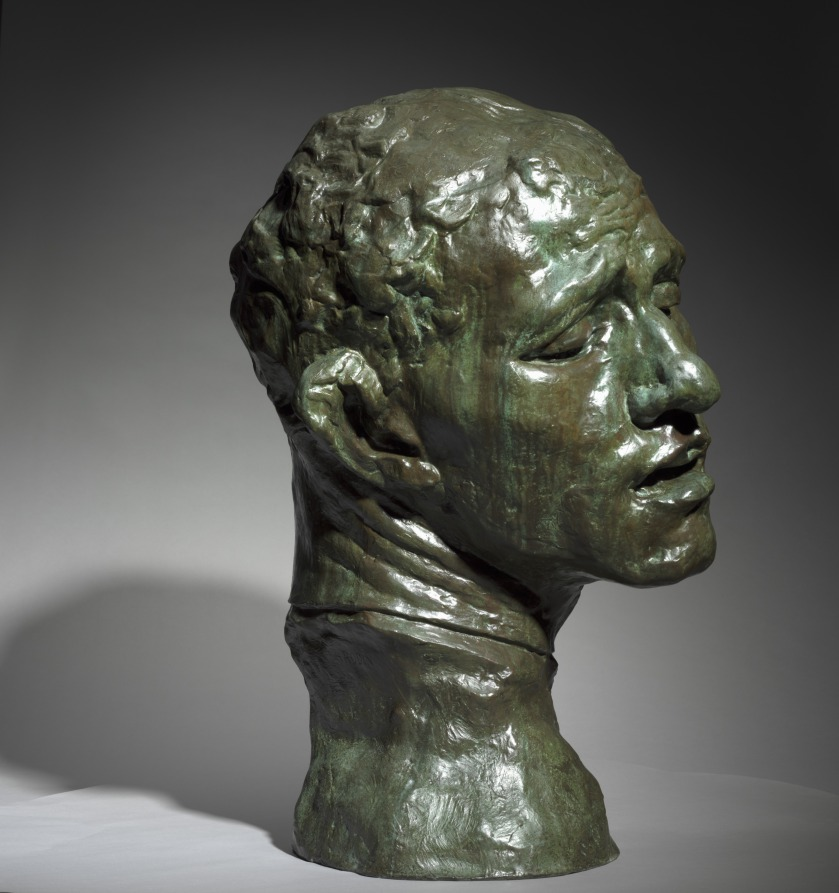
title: Heroic Head of Pierre de Wissant, One of the Burghers of Calais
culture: France, 19th century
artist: Auguste Rodin (French, 1840–1917)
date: 1886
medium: bronze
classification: Sculpture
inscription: inscribed at neck, left: A.Rodin; inscribed lower back: Alexis Rudier/Fondeur-Paris.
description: This sculpture depicts one of the figures in Rodin’s large public monument The Burghers of Calais (1884–89), featuring six French men who volunteered to be taken prisoner by the English in exchange for lifting the siege of Calais during the Hundred Years War (1337–1453). Pierre de Wissant’s anguished expression suggests extreme mental suffering as he contemplates his expected execution. Rodin exhibited a life-size version of the figure as an independent work before completing the monument. He later made multiple versions in various sizes and media.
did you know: This sculpture depicts the head of a figure from Rodin's large public monument The Burghers of Calais (1884-89). The CMA also owns a plaster version of the head.